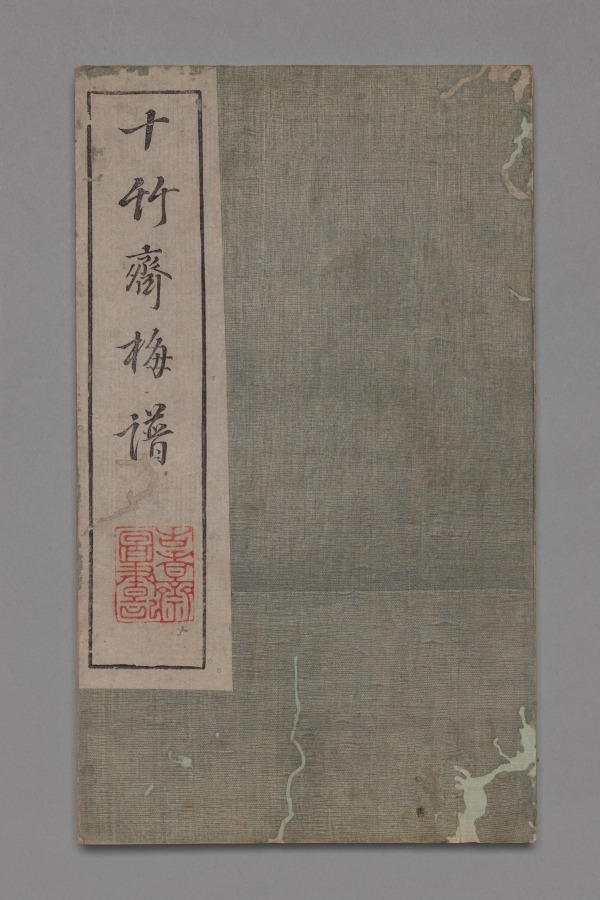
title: Ten Bamboo Studio Painting and Calligraphy Handbook (Shizhuzhai shuhua pu): Plum Blossoms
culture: China, Qing dynasty (1644-1911)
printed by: Hu Zhengyan (Chinese, c. 1584–1674)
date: 1633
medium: Woodblock-printed book; ink and colors on paper; first edition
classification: Print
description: Color printing reached a level of perfection in the early 1600s, as seen in this Ten Bamboo Studio Collection of Calligraphy and Painting and the Mustard Seed Garden Manual of Painting (printed 1679 and 1701). The painterly quality, precision in registering (aligning) the woodblocks, and harmonious colors made them the most successful color print editions in Chinese history. Both editions were printed and compiled in Nanjing, spread nationwide, and had a great impact on the arts in Japan and Korea.